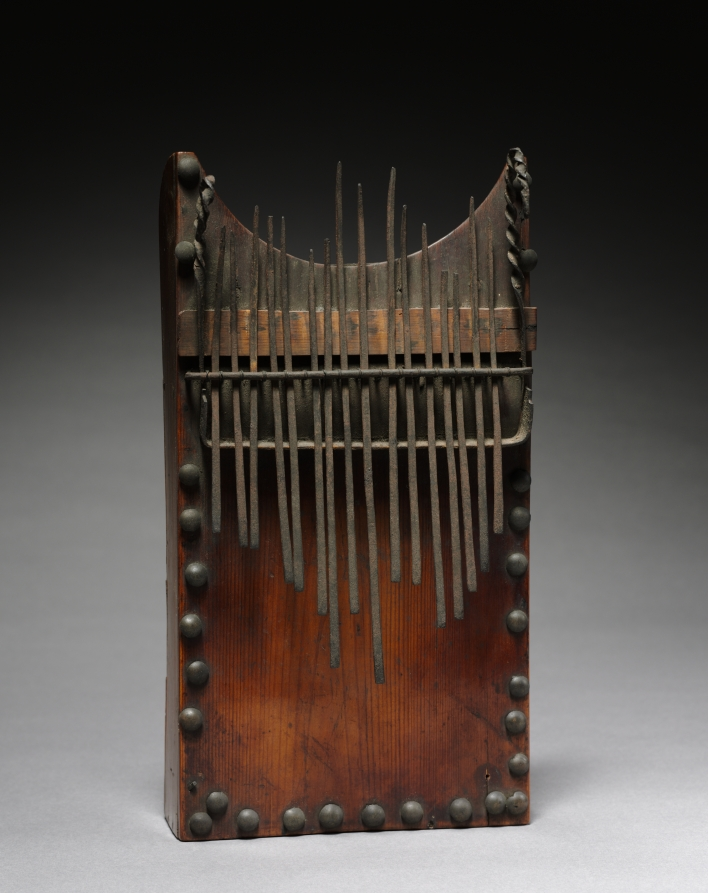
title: Lamellophone "thumb piano"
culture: Africa, Central Africa, Democratic Republic of Congo, Bushoong-style maker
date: 1900s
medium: Wood, iron, and upholstery studs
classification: Musical Instrument